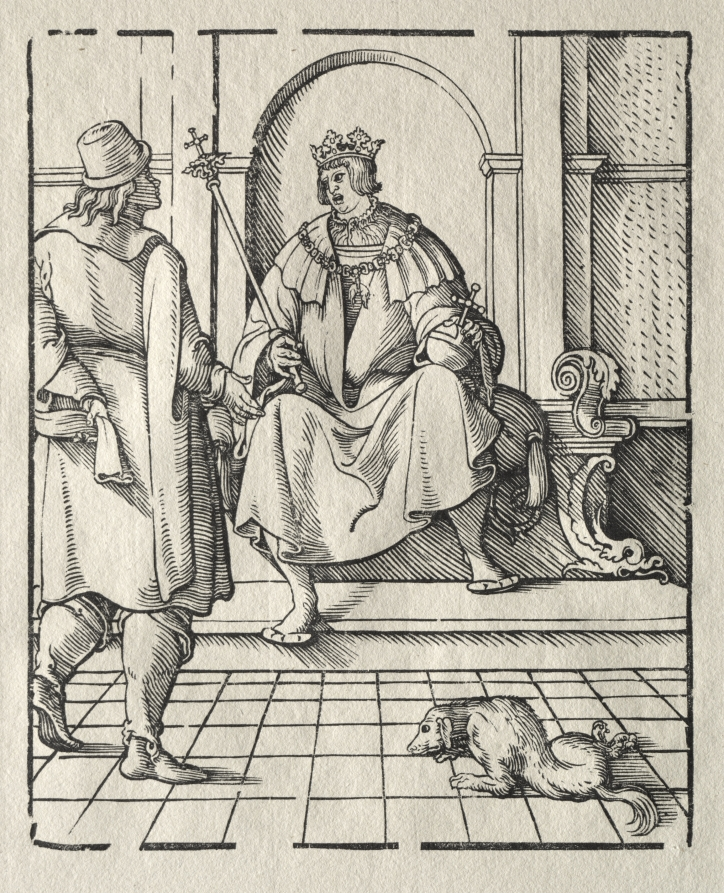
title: A king Enthroned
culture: Germany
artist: Peter Flötner (German, 1485–1546)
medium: woodcut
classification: Print